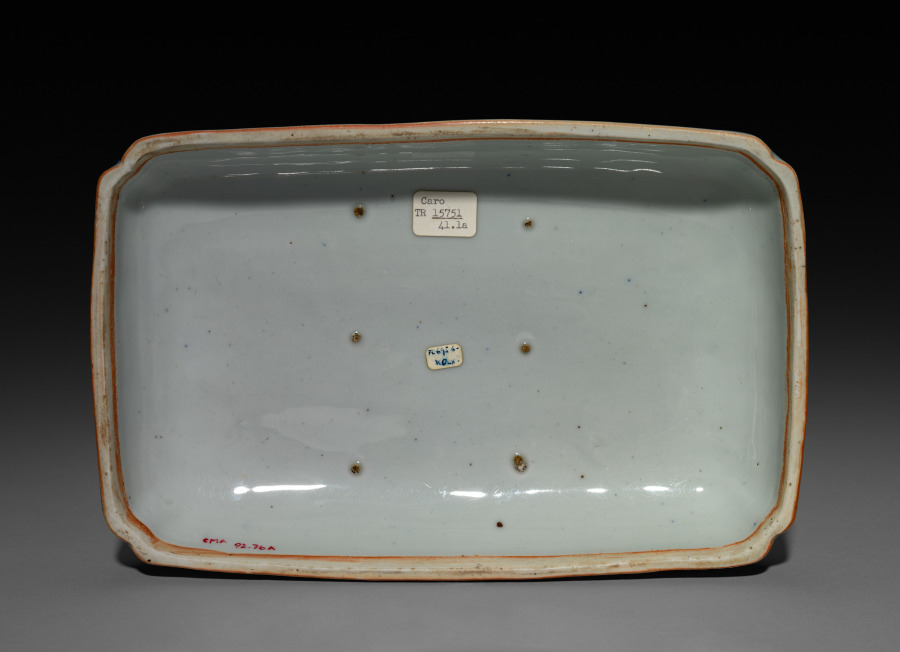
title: Covered Box with Dragons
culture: China, Jiangxi province, Jingdezhen kilns, Ming dynasty (1368-1644), Wanli reign (1572-1620)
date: 1573–1620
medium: porcelain with underglaze blue decoration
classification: Ceramic